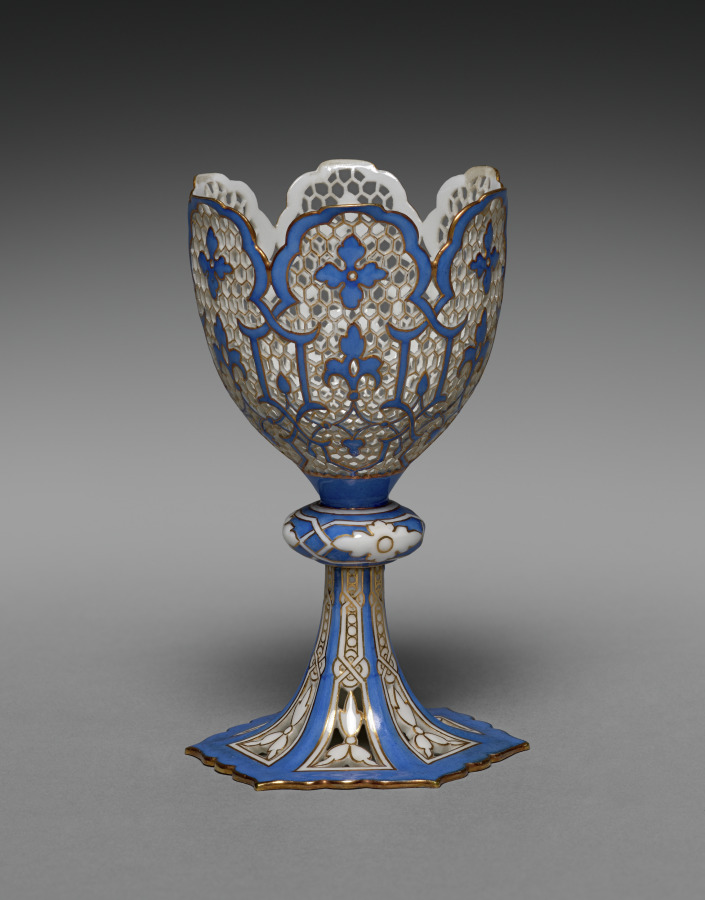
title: Cupholder (Zarf)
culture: France, Sèvres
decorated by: Guyonnet (French)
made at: Sèvres Porcelain Factory (French, est. 1756)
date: c. 1848–55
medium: hard-paste porcelain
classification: Ceramic